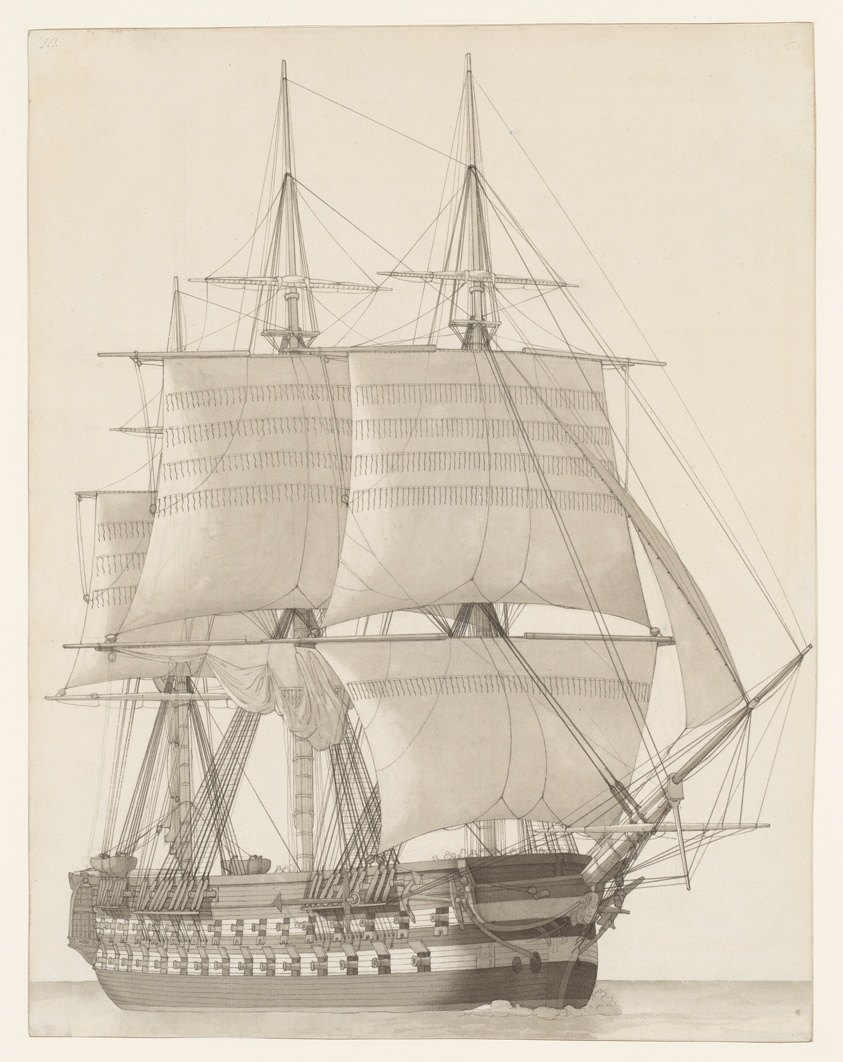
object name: Drawing and Watercolor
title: Vessel of the Russian Line (Vaisseau de ligne russe)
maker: Christoffer Wilhelm Eckersberg (Danish, 1783-1853)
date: 1827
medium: Pen and black ink, with brush and black ink wash and touches of graphite, on ivory laid paper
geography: Denmark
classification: drawings (visual works); paper; pen and ink drawings; prints and drawing